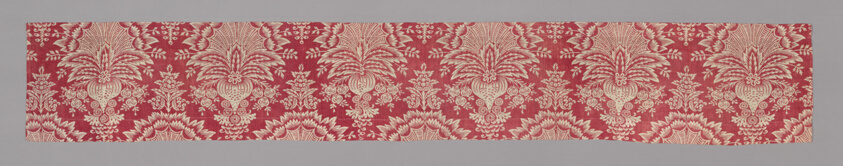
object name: Textile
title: Panel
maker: France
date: c. 1830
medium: Cotton, plain weave; block printed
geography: France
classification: textile; weaving - printed; printed textile